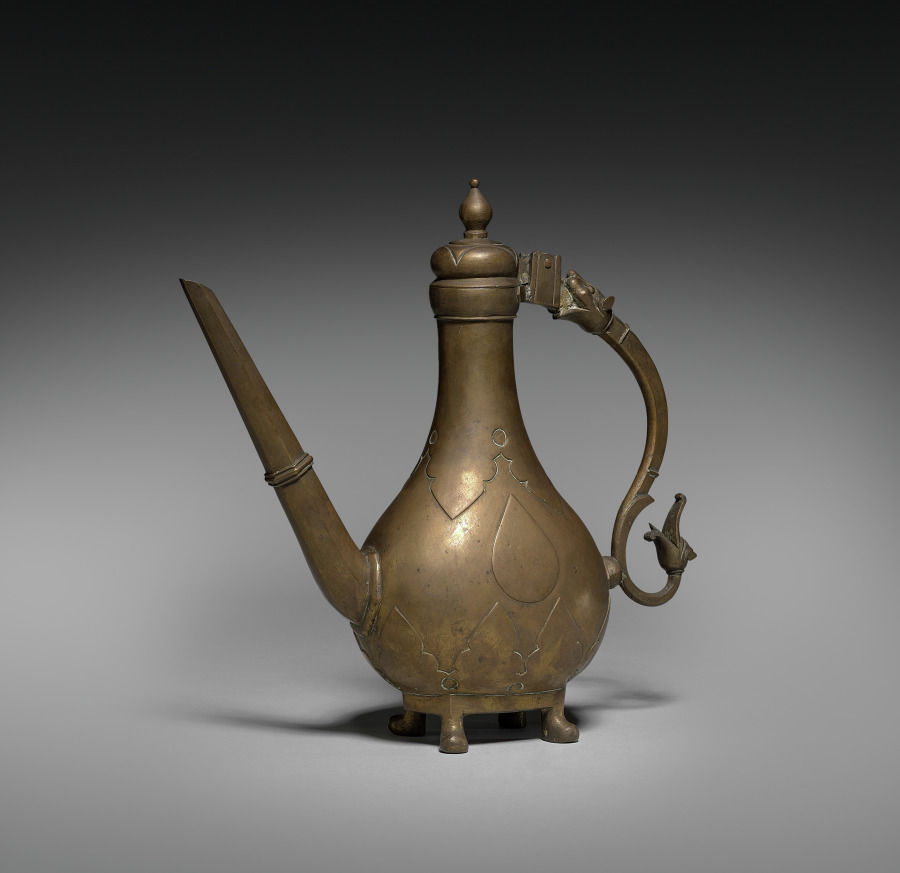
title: Vessel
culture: India, Benares, 19th century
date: 1800s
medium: brass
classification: Metalwork